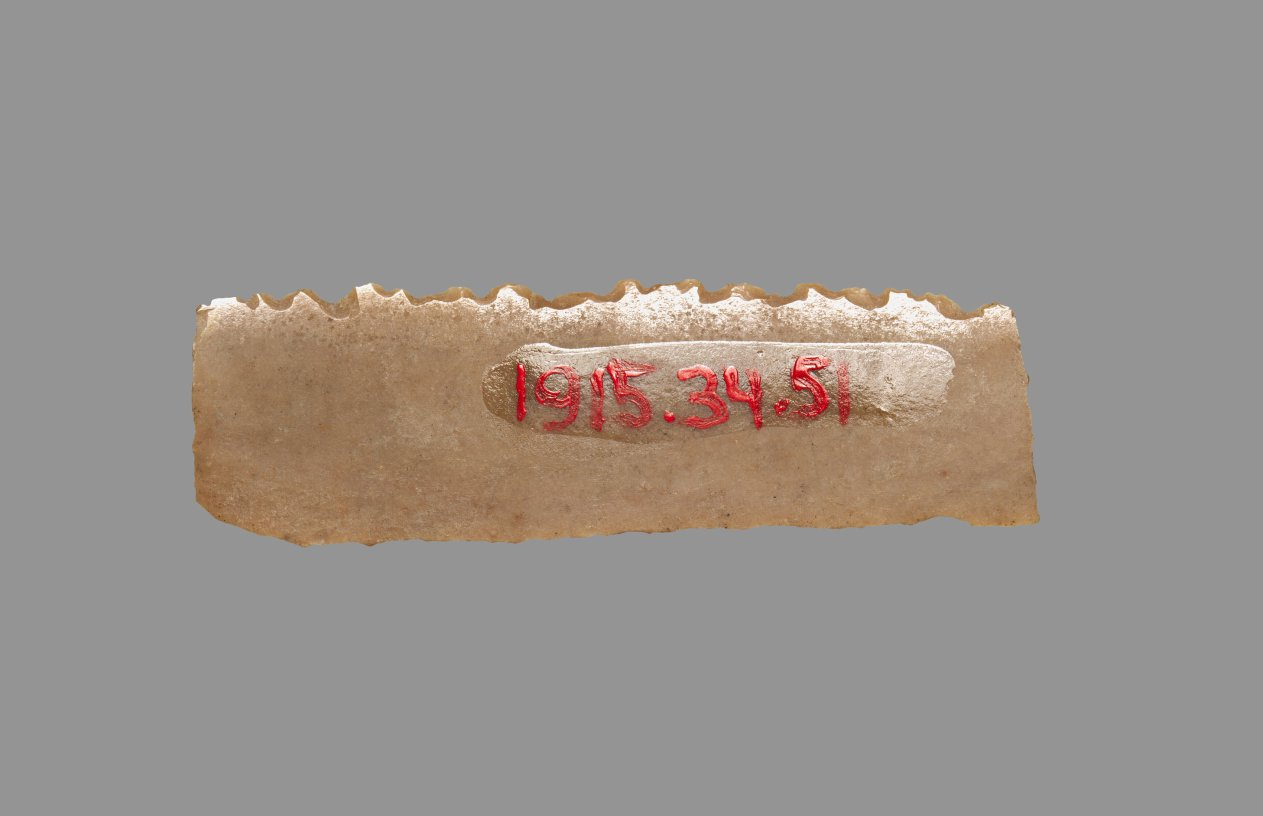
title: Sickle Blade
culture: Egypt, Middle Kingdom (2040–1648 BCE), Dynasty 12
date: 1980–1801 BCE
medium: flint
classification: Implements